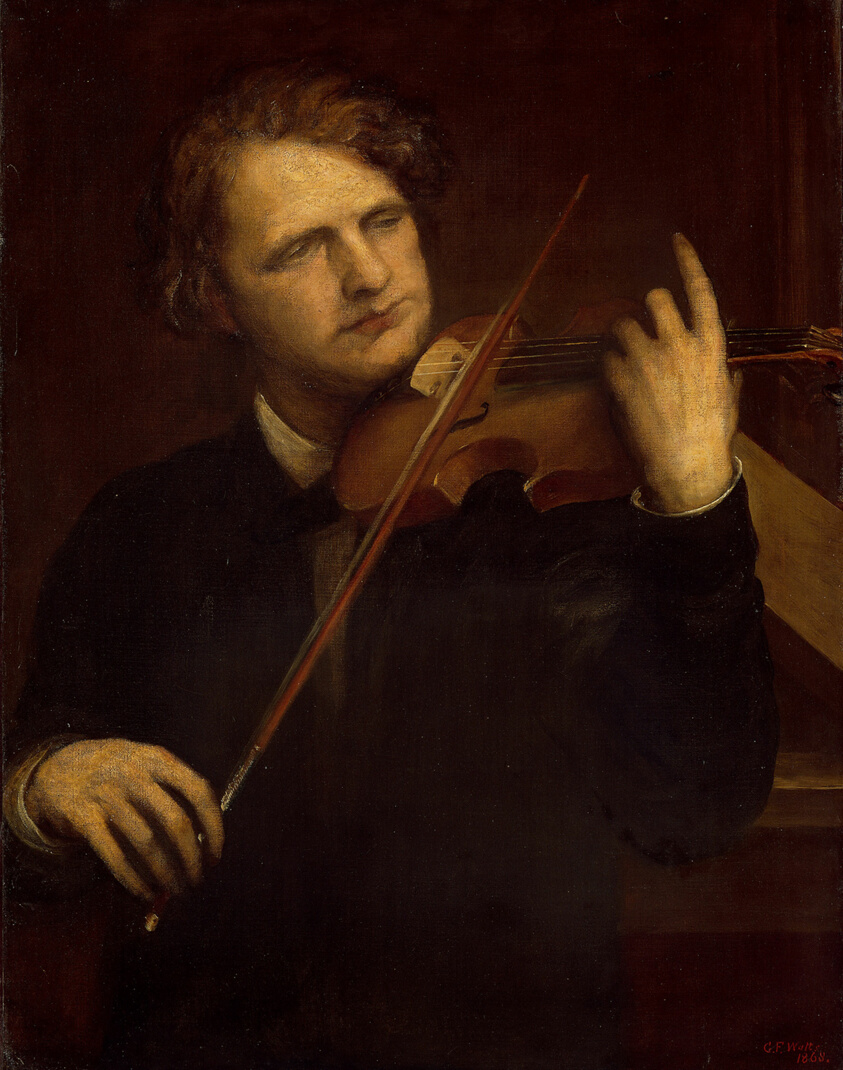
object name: Painting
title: A Lamplight Study: Herr Joachim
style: nineteenth century, 19th century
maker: George Frederick Watts (English, 1817–1904)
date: 1868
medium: Oil on canvas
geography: England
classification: painting; british; oil on canvas; oil paintings (visual works); paint; european painting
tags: study, violins, studies, portraits: male subject, portraits, portrait, performance, musicians, musical instruments, man